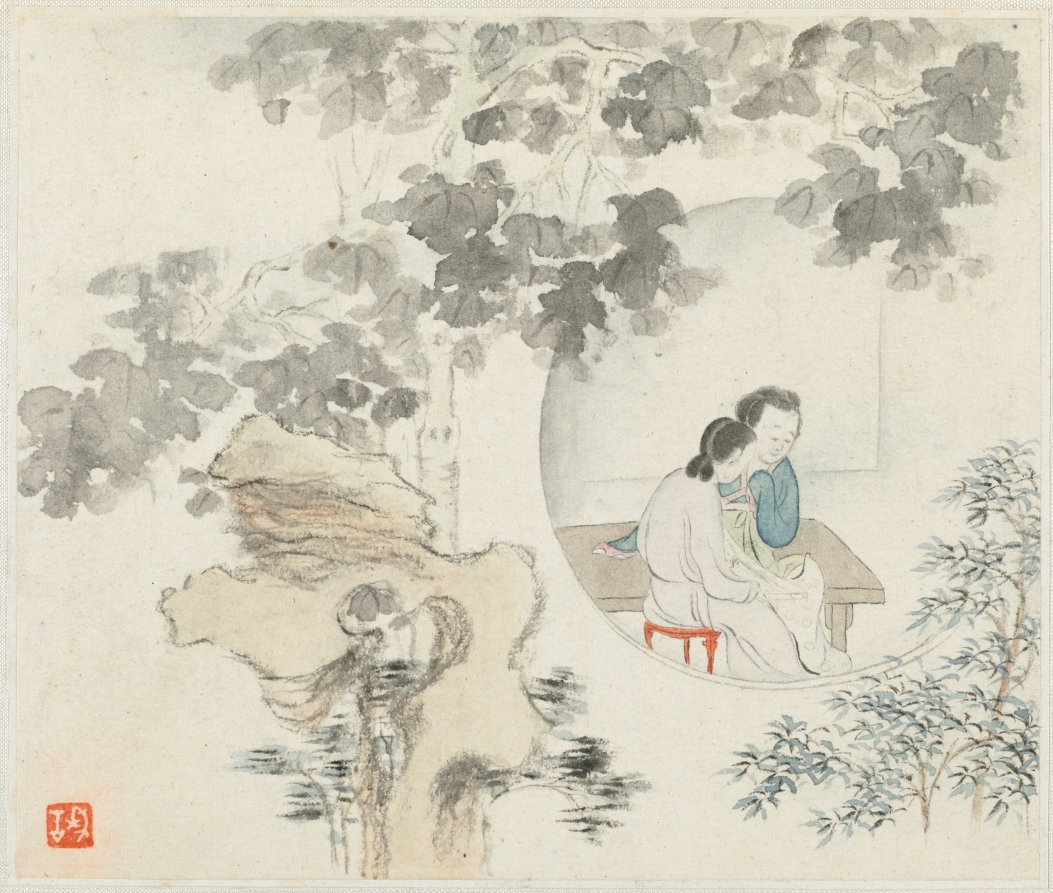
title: Album of Landscape Paintings Illustrating Old Poems: Two Women with Needlework in a Garden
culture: China, Qing dynasty (1644-1911)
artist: Hua Yan (Chinese, 1682–c. 1765)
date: 1745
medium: Album leaf; ink and light color on paper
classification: Painting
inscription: Seal, lower left corner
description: Two women doing needlework are confined in an interior space. The other 11 paintings in this Hua Yan album show men in nature. The women may experience the natural world only through the large moon-shaped window open to a garden. Prominently displayed in the garden is a Taihu stone, like CMA 2022.23. Taihu stones are valued for their natural shapes and sculptural qualities and are a cultural peculiarity. These perforated limestones were originally sourced from Lake Tai in southeast China from where they got their names. Large ones were set up like sculptures in gardens, like the one in this painting.